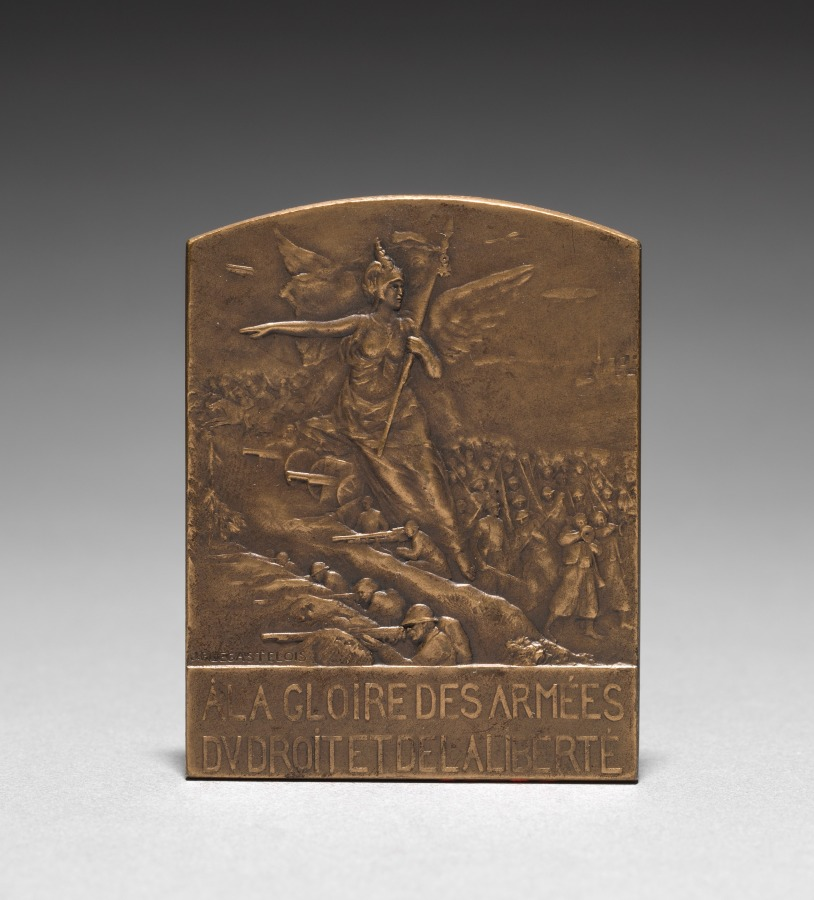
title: Medallion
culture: France, 19th-20th century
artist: Jules Prosper Legastelois (French, 1855–1931)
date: 19117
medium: bronze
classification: Metalwork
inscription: "À la gloire des armées du droit et de la liberté."